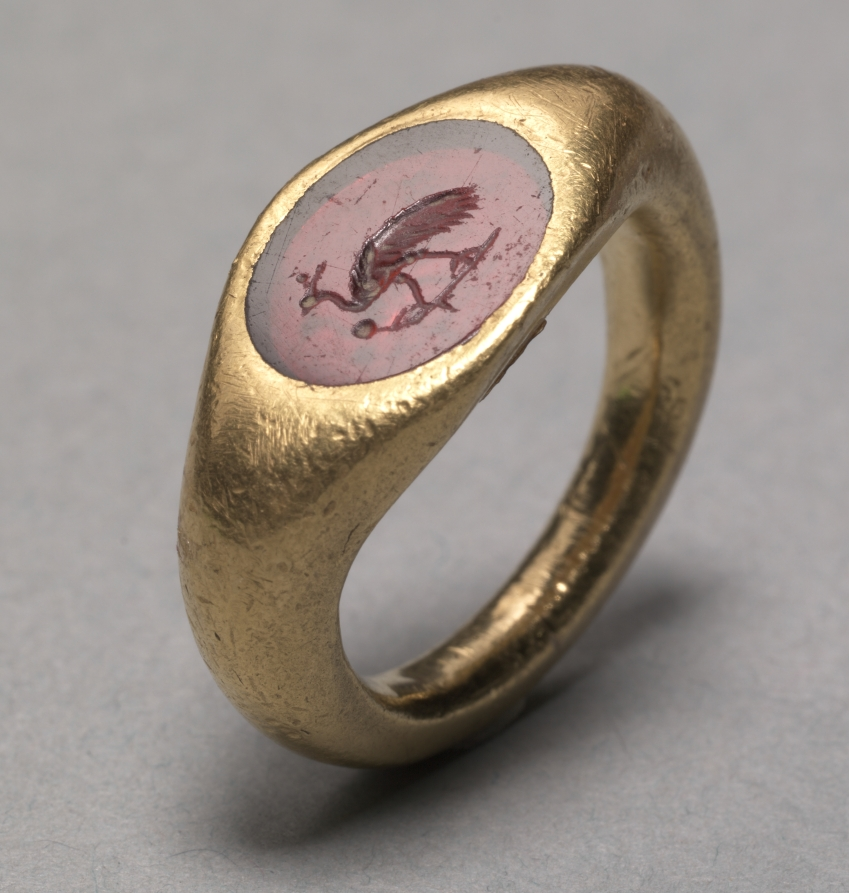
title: Peacock Ring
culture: Seleucia, Parthian Empire (247 BCE–224 CE)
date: 1–200 CE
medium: gold and chalcedony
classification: Jewelry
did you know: Made of gold inset with chalcedony, a type of quartz, this simple yet elegant signet ring has timeless appeal. A skilled artisan carved a peacock into the oval stone creating an emblem that would have had personal meaning for the owner.